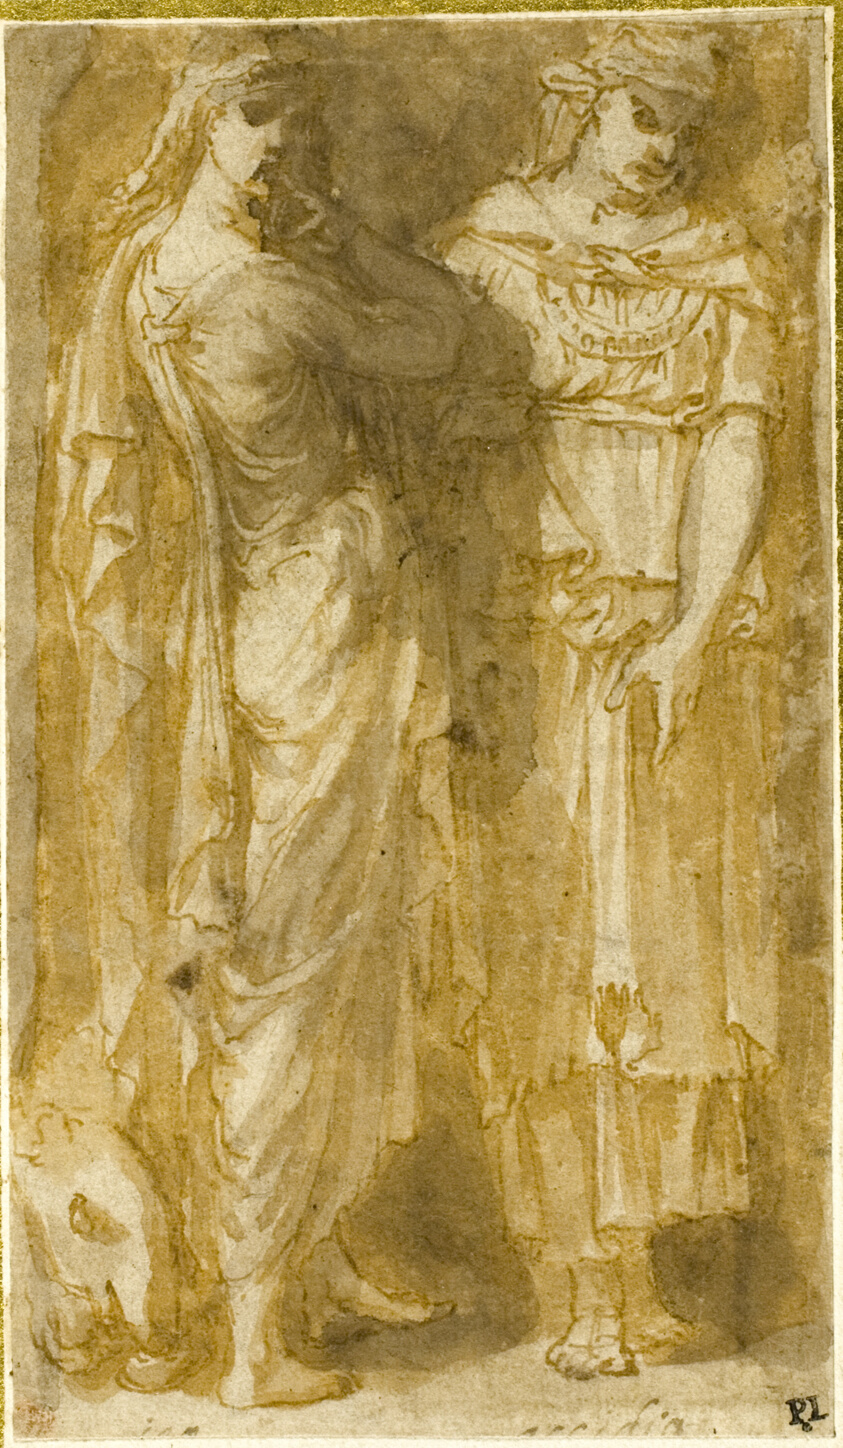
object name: Drawing and Watercolor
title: Two Standing Female Allegorical Figures: Anger and Sloth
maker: Circle of Pirro Ligorio (Italian, c. 1513-1583)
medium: Pen and brown ink with brush and brown and gray wash, on ivory laid paper, edge mounted, tipped on to cream laid paper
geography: Italy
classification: ink with wash; drawings (visual works); prints and drawing